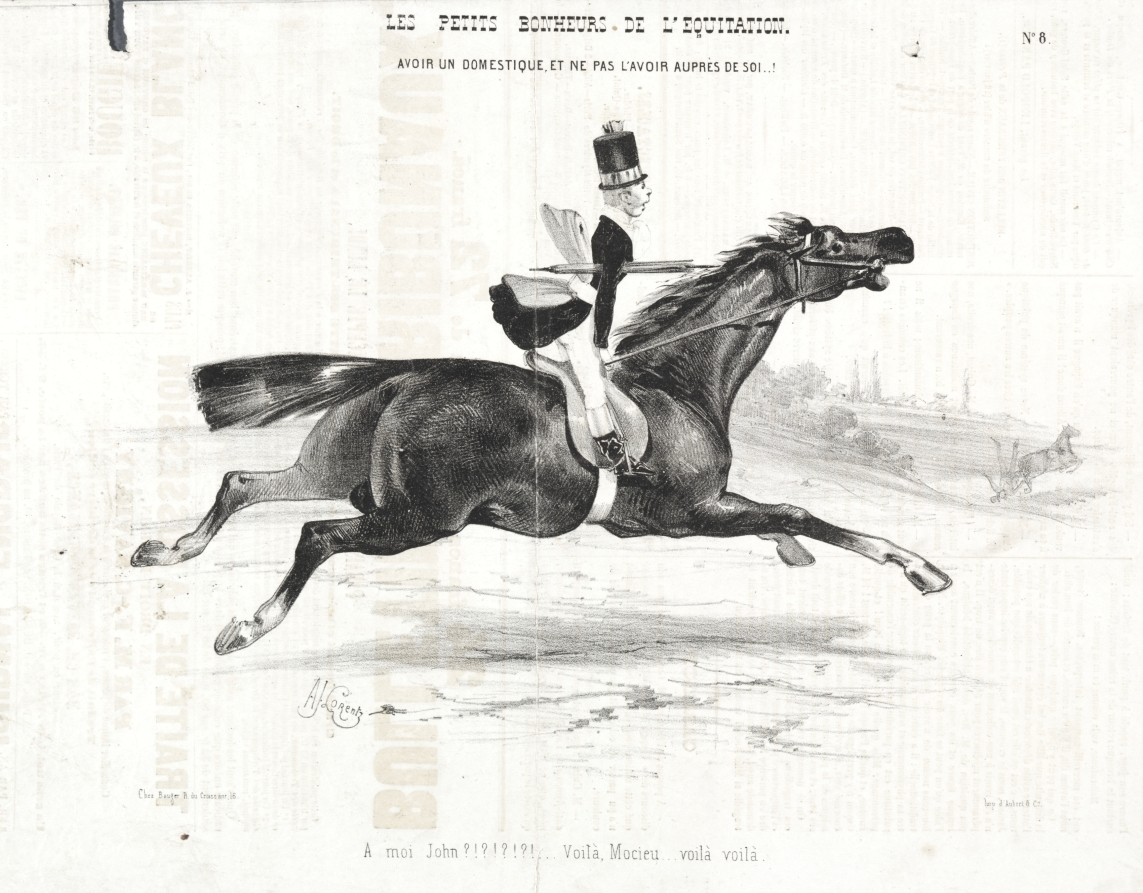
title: Les petits bonheurs de l'équitation: Avoir un domestique, et ne pas l'avoir auprès de soi...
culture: France, 19th century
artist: Alade Joseph Lorentz (French, 1813-after 1858)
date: 1842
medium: lithograph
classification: Print